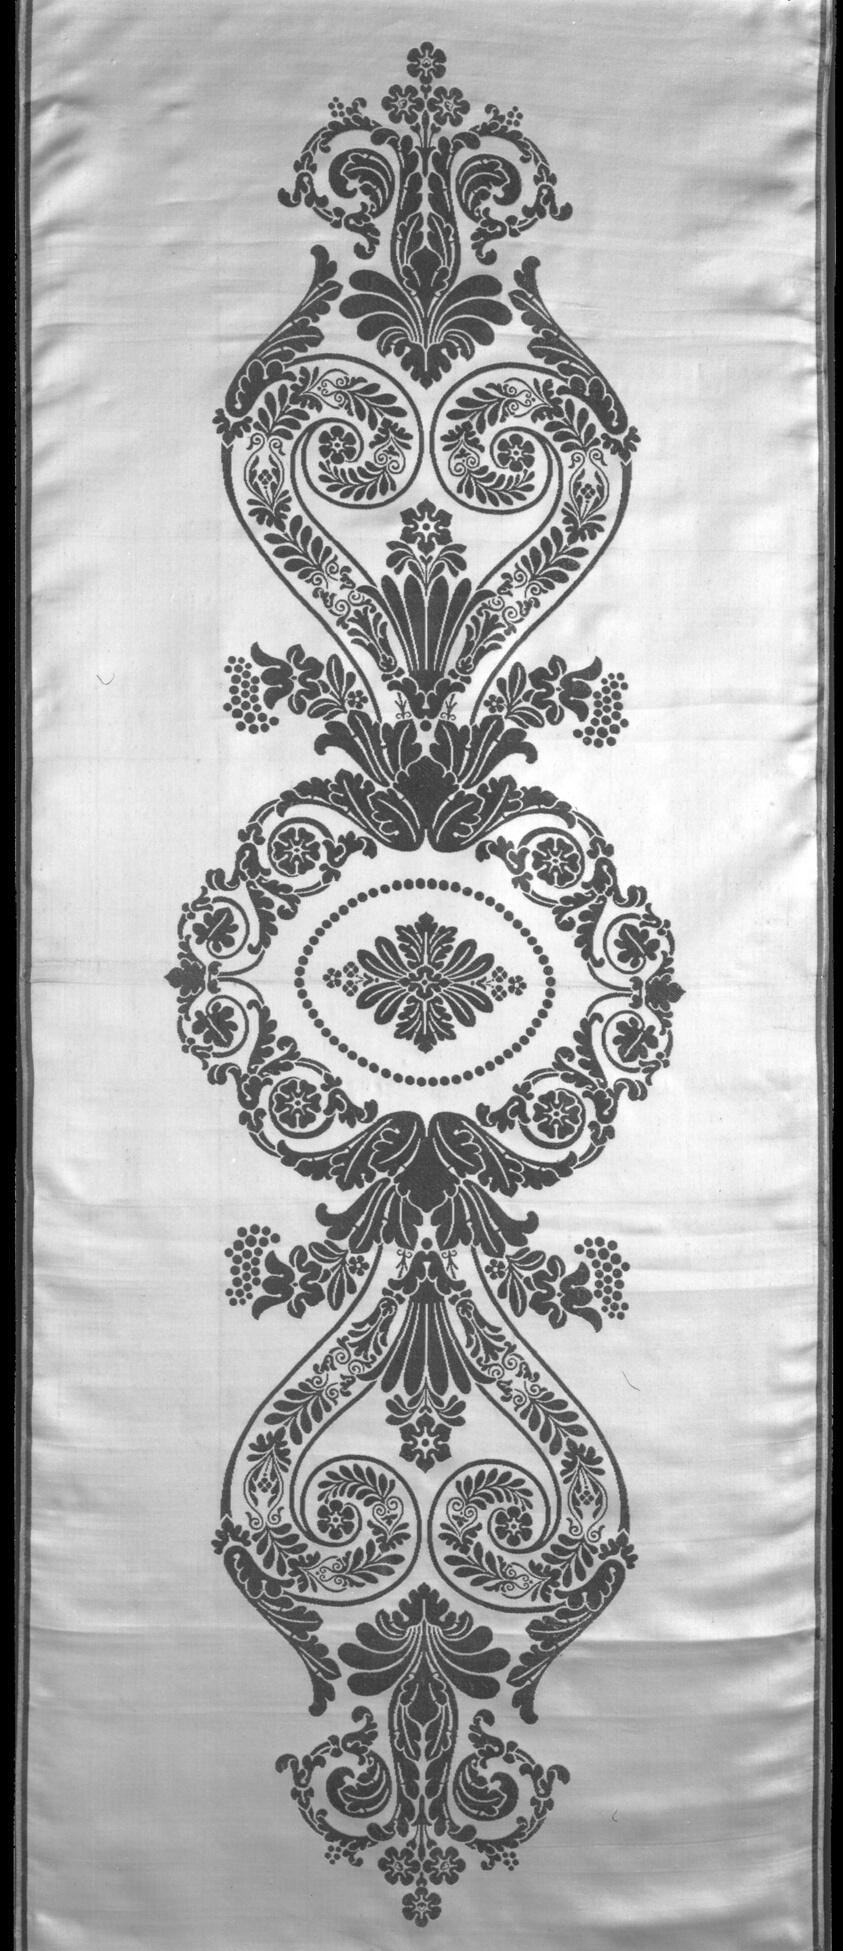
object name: Textile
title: Set of a Settee and Chair Cover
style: empire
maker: France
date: 1800/25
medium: Silk, warp-float faced 4:1 satin weave with weft-float faced 1:3 twill interlacings of secondary binding warps and supplementary patterning wefts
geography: France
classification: textile; weaving